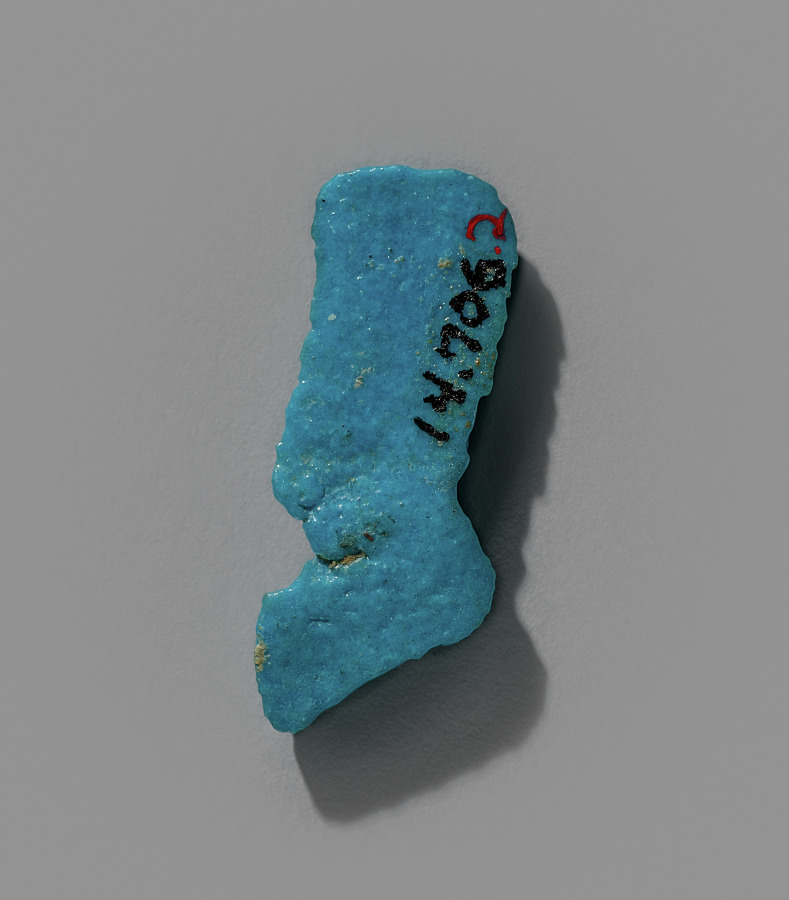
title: Food Model Amulet: Haunch of Meat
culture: Egypt, New Kingdom (1540–1069 BCE), Dynasties 19–20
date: 1295–1069 BCE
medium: turquoise faience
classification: Amulets